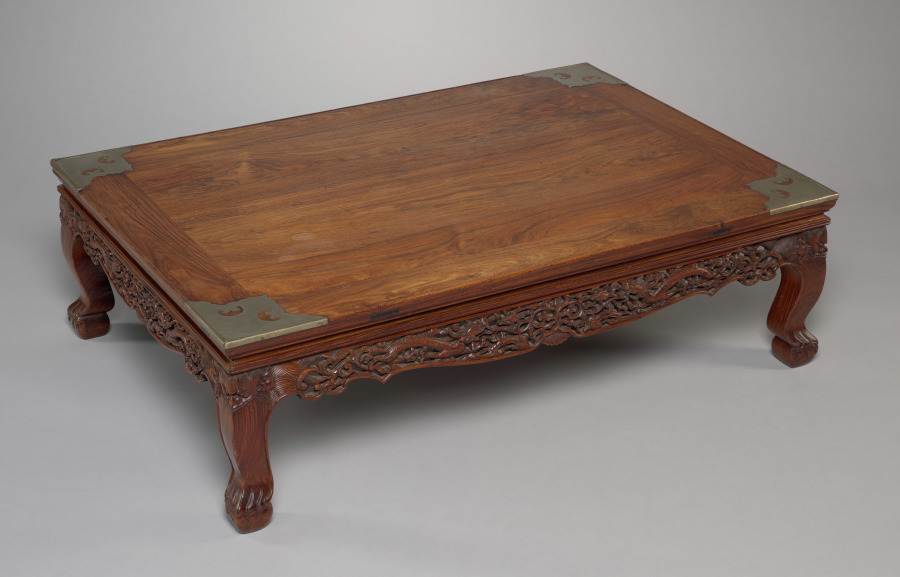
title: Low Table (kang zhuo) with Dragons in Clouds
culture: China, Ming dynasty (1368-1644) or Qing dynasty (1644-1911)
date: 1600s–1700s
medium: Rosewood (huanghuali) and metal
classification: Furniture and woodwork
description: Originally, low tables were placed on a kang, a raised platform made of brick and heated by a fire underneath, which served as a bed and living space on cold winter days in northern China. During the daytime, these platforms could accommodate two sitters with a kang table placed between them. In the warmer south, kang tables were used on daybeds made of wood. By the Ming and Qing dynasties, furniture makers used rare tropical hardwood, such as huanghuali, known as rosewood.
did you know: Note the curved legs, the elaborate openwork carving, and metal-fitted corners in the form of bats.